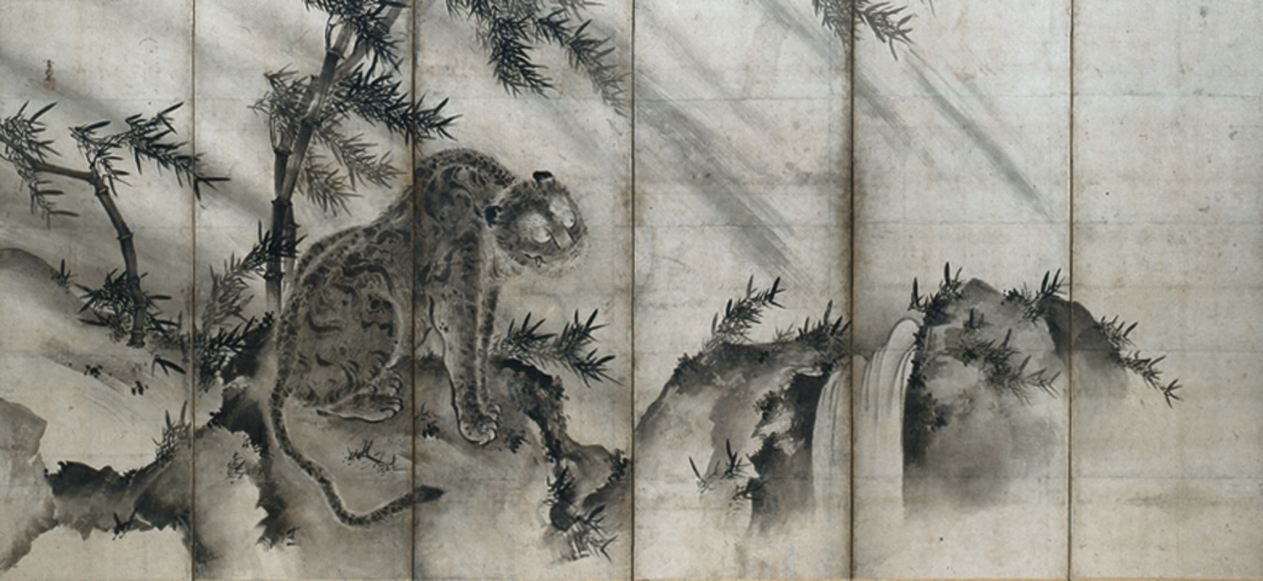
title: Dragon and Tiger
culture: Japan, Muromachi period (1392–1573) to Momoyama period (1573–1615)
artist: Sesson Shūkei (Japanese, c. 1492–c. 1577)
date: c. 1546–56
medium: One of a pair of six-panel folding screens; ink on paper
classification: Painting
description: In Chinese cosmology, the tiger's roar is said to produce wind. In Chinese paintings, the tiger is often shown with a dragon, who creates rain clouds. Together, they represent the balancing forces of the universe. Chinese presentations of the theme, often in hanging scroll format, provided the basic composition for the pair of screens to which this one belongs.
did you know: Although the theme of this painting derives from Chinese philosophy and pictorial culture, Sesson's tiger is likely modeled after Korean prototypes of the Joseon period circulating in Japan.